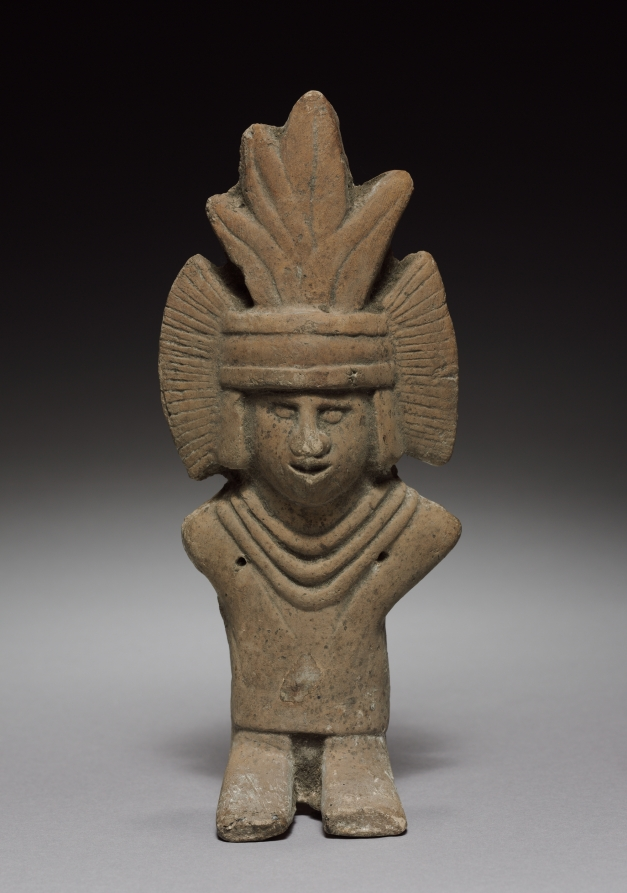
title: Figurine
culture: Mexico, Aztec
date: 1325–1521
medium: pottery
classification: Ceramic